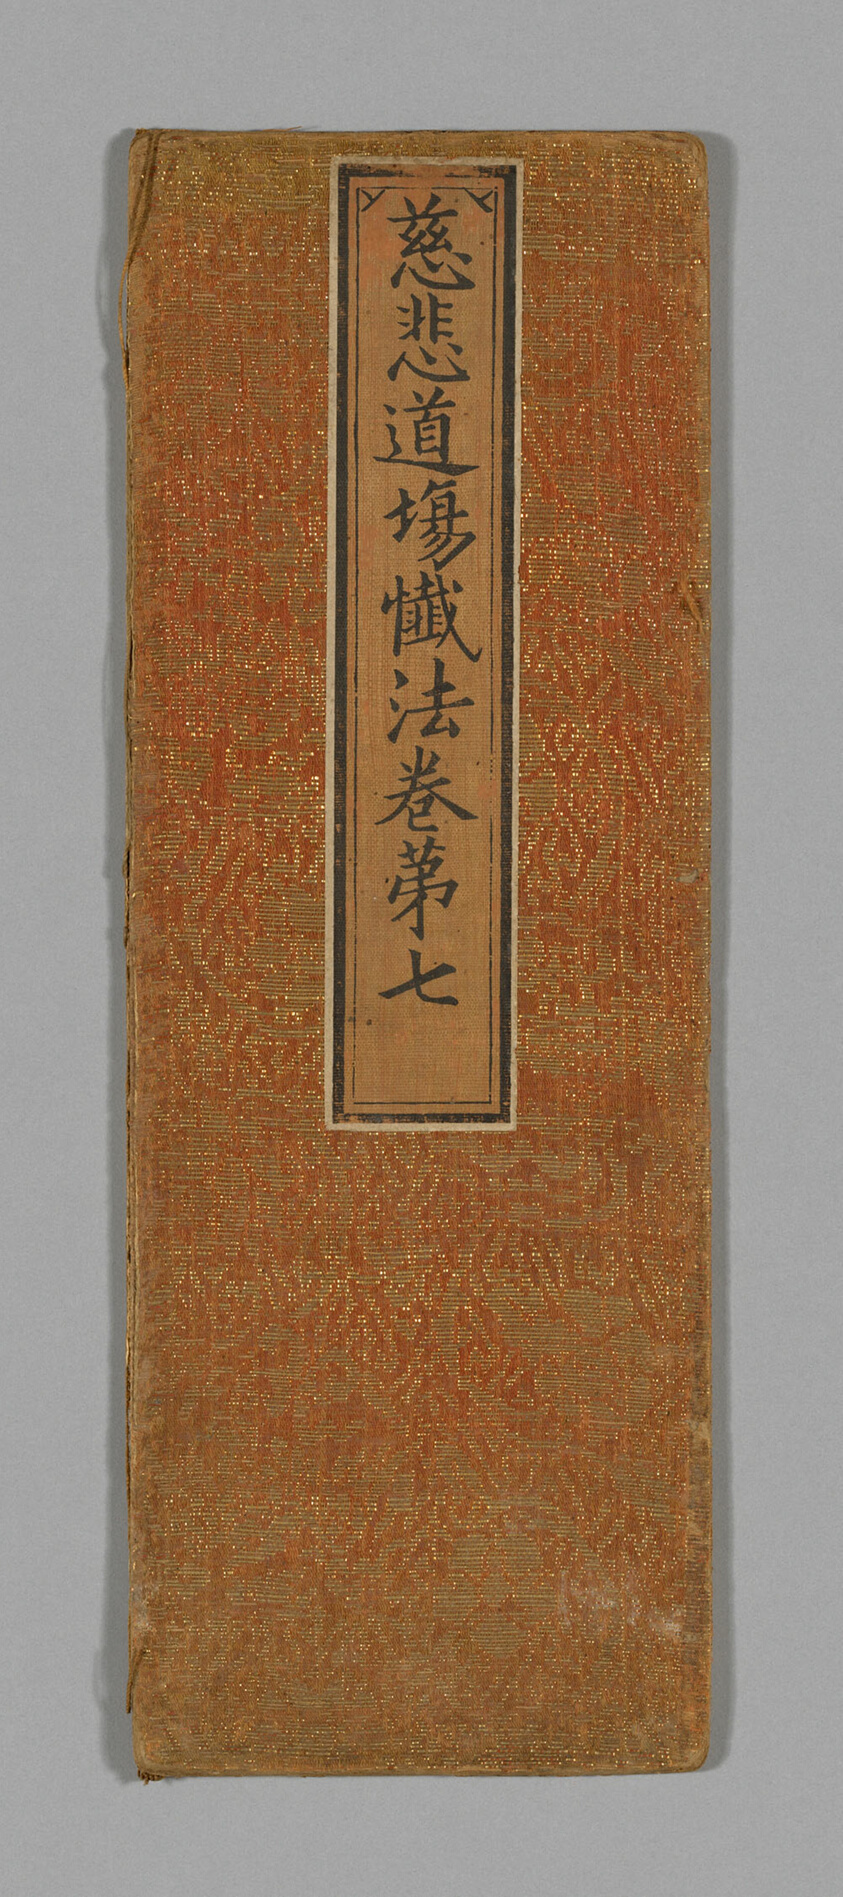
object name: Textile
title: Sutra Cover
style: ming, Chinese (culture or style), East Asian, asian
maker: China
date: Ming dynasty (1368–1644), c. 1590's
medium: Silk and gold-leaf-over-lacquered-paper strip, warp-float faced 4:1 satin weave with supplementary pattering wefts bound in weft-float faced 1:4 satin interlacings; label: silk, plain weave; painted in ink; glued to paper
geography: China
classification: textile; weaving